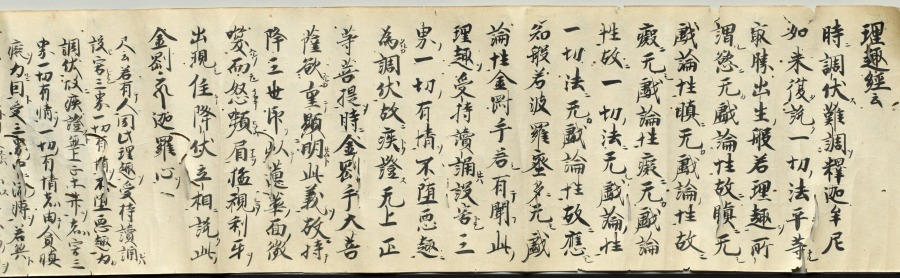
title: Scroll of Miscellaneous Notes written on a Calendar by Priest Seigen (recto)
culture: Japan, Kamakura period (1185–1333)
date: c. 1200–1231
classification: Manuscript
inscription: bears miscellaneous notes written by Priest Seigen.